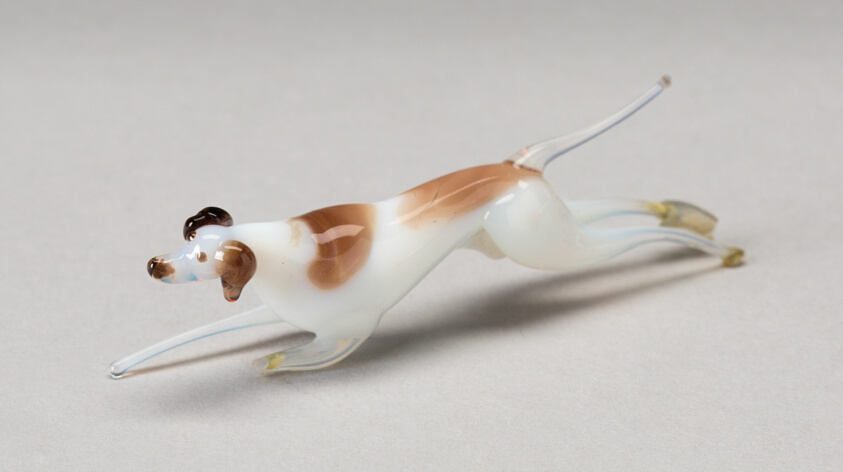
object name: Glass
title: Leaping Dog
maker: Nevers, France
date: 18th century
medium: Glass; lampwork (verre de Nevers), metal armature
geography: France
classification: glass; miniature; decorative object/ornament; european decorative arts